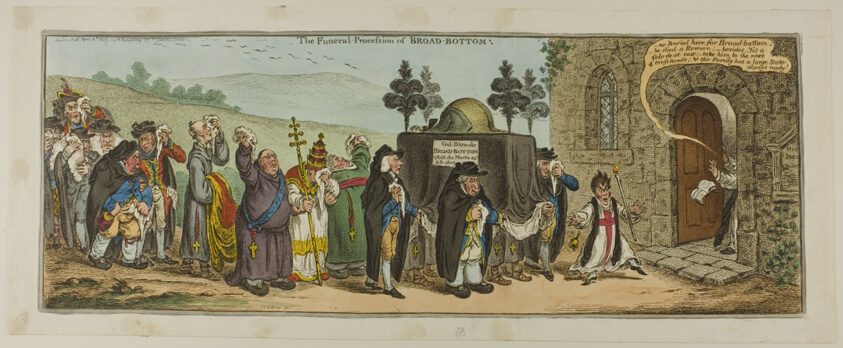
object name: Print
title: The Funeral Procession of Broad-Bottom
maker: James Gillray (English, 1756-1815); published by Hannah Humphrey (English, c. 1745-1818)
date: published April 6, 1807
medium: Hand-colored etching on paper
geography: England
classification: etching; print; prints and drawing